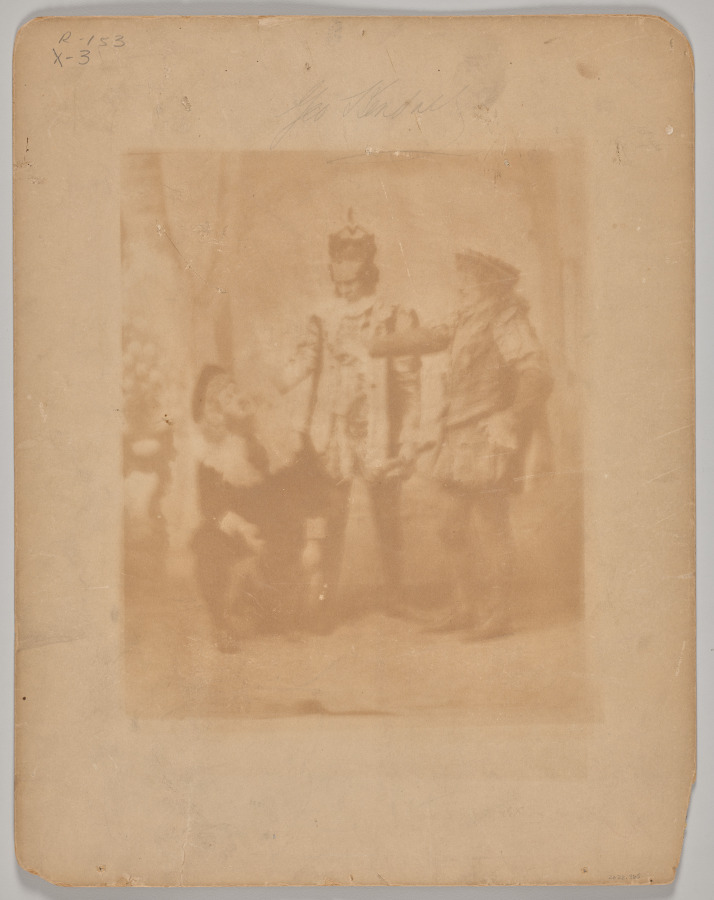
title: Untitled (man posing as a ballerina)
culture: America or England, 19th century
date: 1870s-1880s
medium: woodburytype or gelatin silver print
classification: Photograph